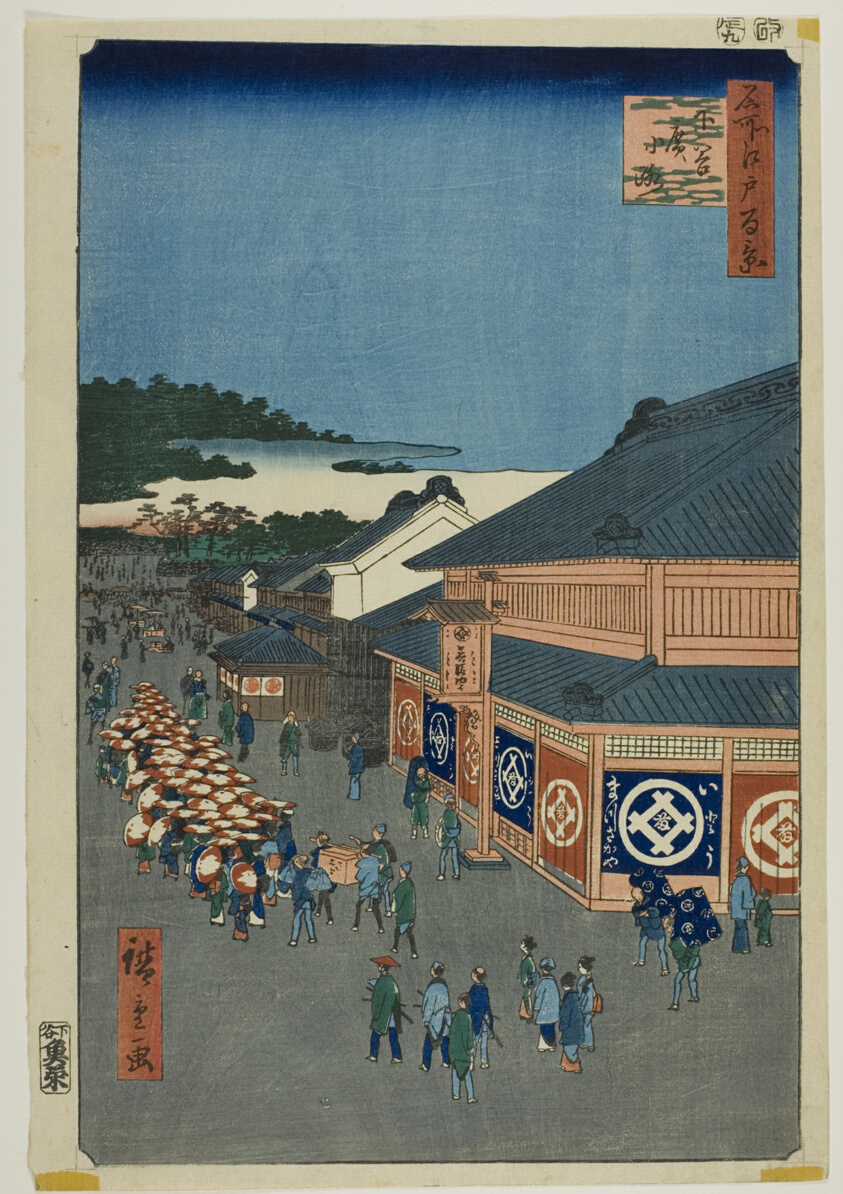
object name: Print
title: Shitaya Hirokoji, from the series “One Hundred Famous Views of Edo (Meisho Edo hyakkei)”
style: Japanese (culture or style)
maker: Utagawa Hiroshige 歌川 広重; Japanese, 1797–1858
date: 1856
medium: Color woodblock print; oban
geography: Japan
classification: woodblock print; print